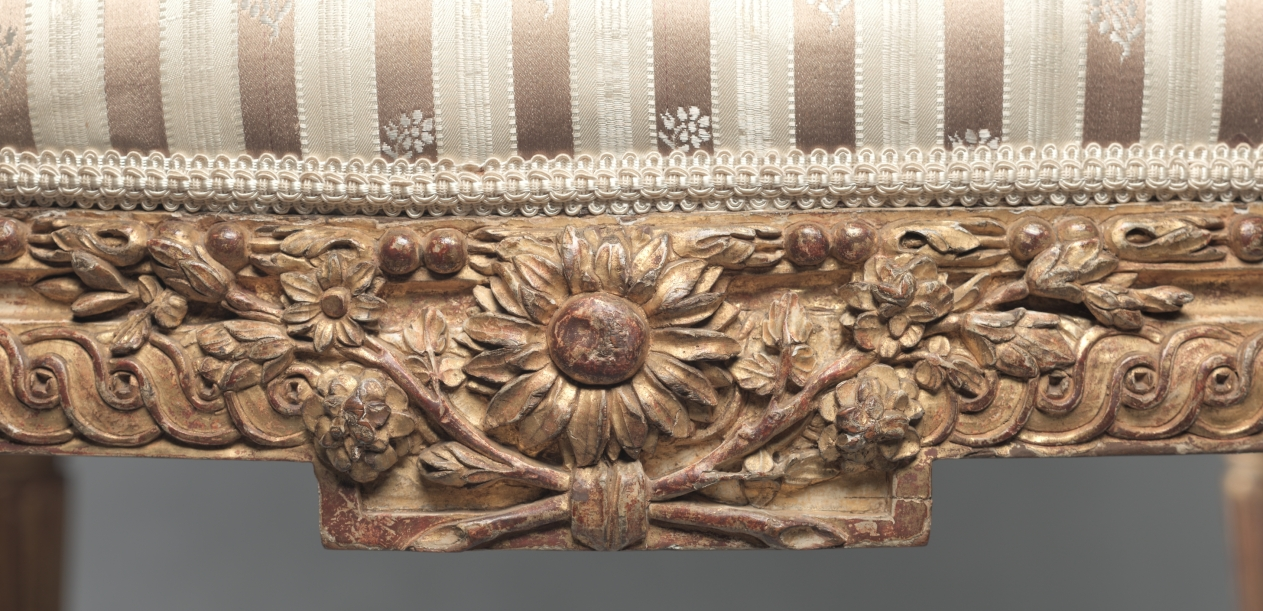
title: Armchair (Fauteuil) (2 of 2)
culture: France, 18th century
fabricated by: Jean-Baptiste II Tilliard (French, 1797)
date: c. 1765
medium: carved and gilded wood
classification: Furniture and woodwork